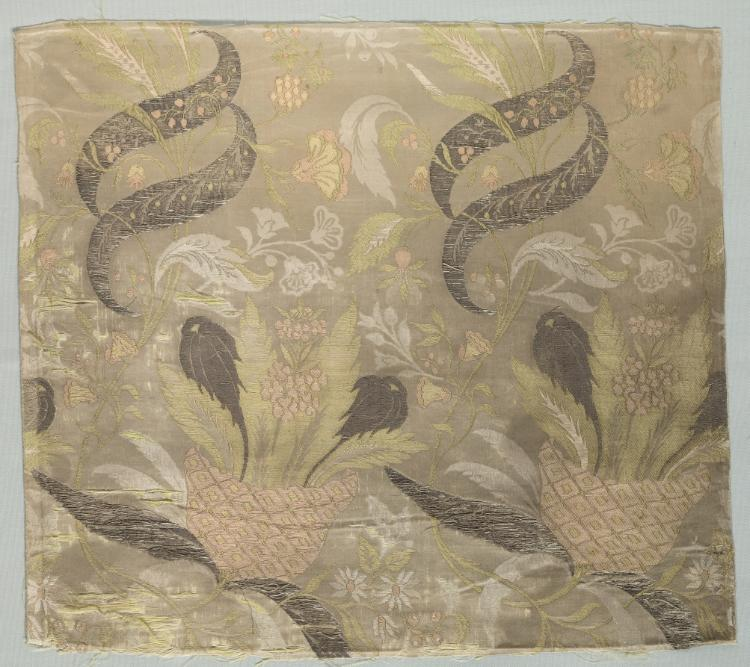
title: Large Floral Motif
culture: France, 19th century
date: 1830–1899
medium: plain compound satin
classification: Textile